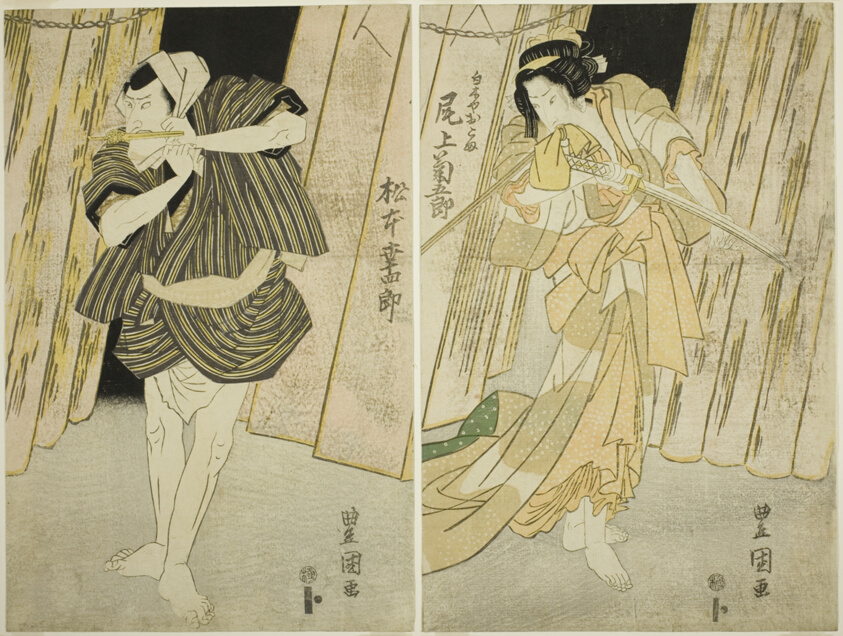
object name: Print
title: The Actors Onoe Kikugoro III (right) as Shirokiya Okoma and Matsumoto Koshiro V (left) as her lover Saiza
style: Japanese (culture or style)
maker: Utagawa Toyokuni I 初代 歌川 豊国; Japanese, 1769–1825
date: c. 1816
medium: Color woodblock prints; two sheets of an oban triptych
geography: Japan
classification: woodblock print; print; asian art